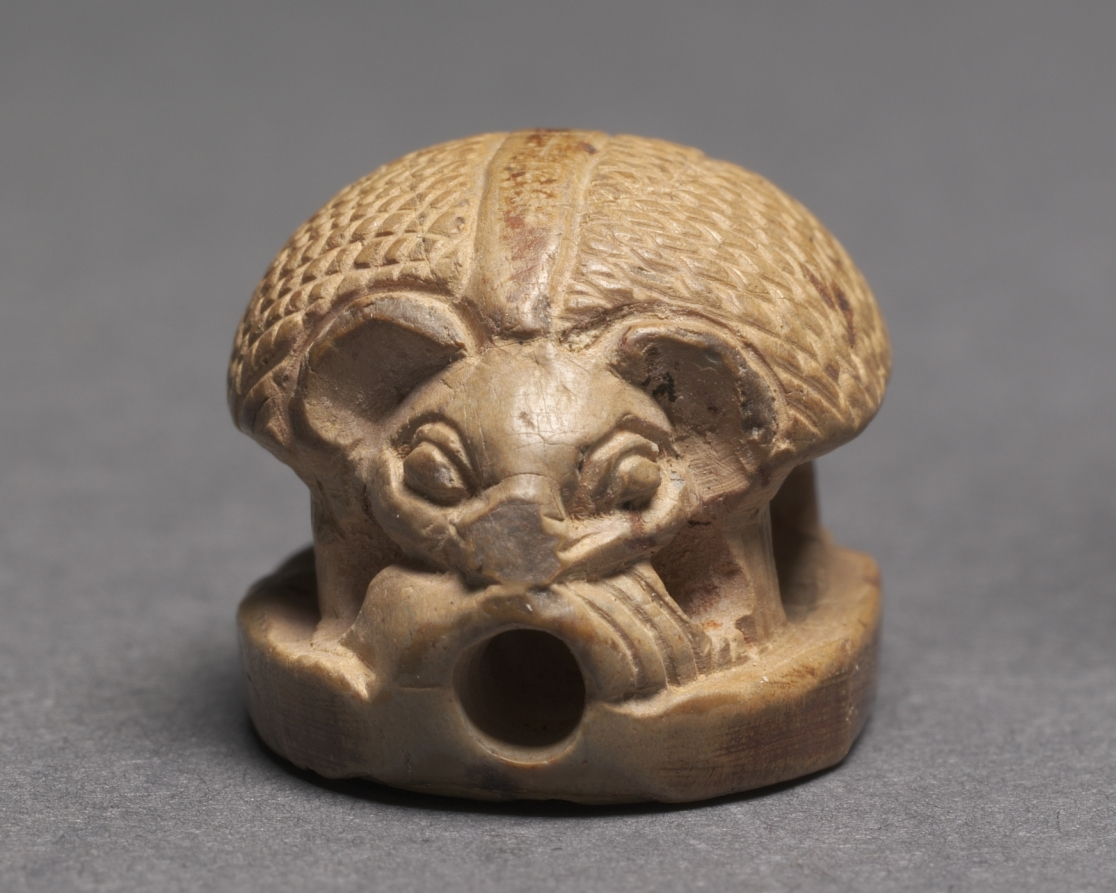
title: Hedgehog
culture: Egypt, New Kingdom (1540–1069 BCE), Dynasty 18, reign of Amenhotep III (1390–1352 BCE)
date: c. 1391–1353 BCE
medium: steatite, originally glazed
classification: Scarabs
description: This hedgehog (Paraechinus aethiopicus) stands in the round on an oval base, with openwork defining the legs. The carving is delicate and spirited. The face features large, round eyes; widely spaced, short ears; bulging cheeks; and a protruding snout. A tiny tail hangs at the rear. Crosshatching on the back represents the animal's spines. The design on the base begins at the head with a winged sun disk with pendant uraei. Below is a cluster of hieroglyphic signs, including an ankh-sign, a falcon with a sun disk, a hoe, and a maat-feather. A neb-sign fills the balance below. The significance of the hedgehog has multiple theories. As a hibernating animal, it may have associated with the powers of self-renewal and resurrection. Another lies in the animal's defensive strategy of inflating itself into a ball and projecting its spines, a posture of obvious apotropaic significance. Lastly, Egyptian folklore maintained that hedgehog amulets provided protection against snake bites, a belief grounded in the animal's natural resistance to poison.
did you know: Hedgehogs were common on amulets in the New Kingdom (1500s–1000s BC) and can also be seen on the backs of seals and scaraboids.